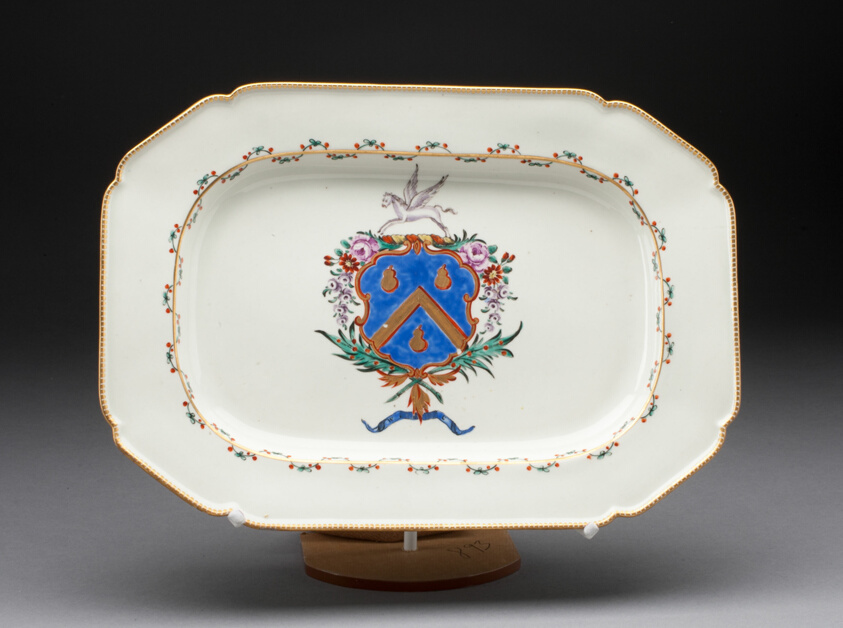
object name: Ceramics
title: Platter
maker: Worcester Porcelain Factory (Flight Period, 1783-1792); Worcester, England, founded 1751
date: c. 1780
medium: Soft-paste porcelain, polychrome enamels and gilding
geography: Worcester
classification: vessel for serving food; dish (vessel); tableware; porcelain; european decorative arts; ceramics